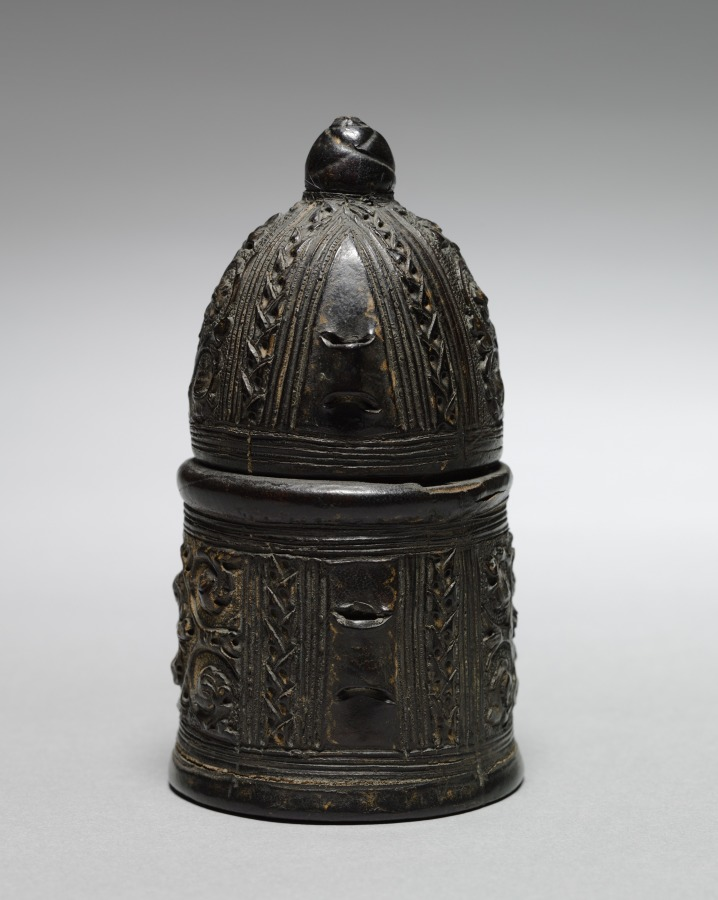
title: Ink Pot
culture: Northern Italy, 15th century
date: c. 1425–1450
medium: leather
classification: Leather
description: Intended for use on the writing table, this ink pot was used with a dip pen or quill. It may have belonged to a professional scribe or scholar, or perhaps to a wealthy layperson. The leather is embellished by tooling, embossing (pressing), and punching.